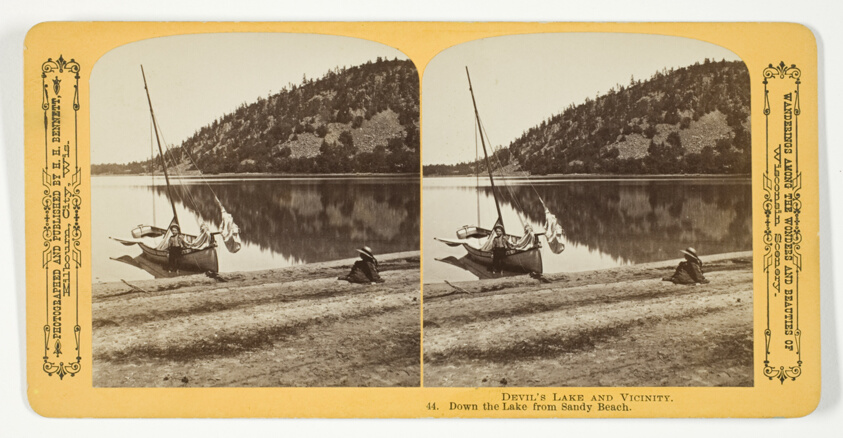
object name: Photograph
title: Down the Lake from Sandy Beach, No. 44 from the series "Devil's Lake and Vicinity"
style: 19th century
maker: Henry Hamilton Bennett (American, born Canada, 1843-1908)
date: 1870/1908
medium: Albumen print, stereo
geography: Wisconsin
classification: photography; photograph; albumen silver print; stereograph (albumen)